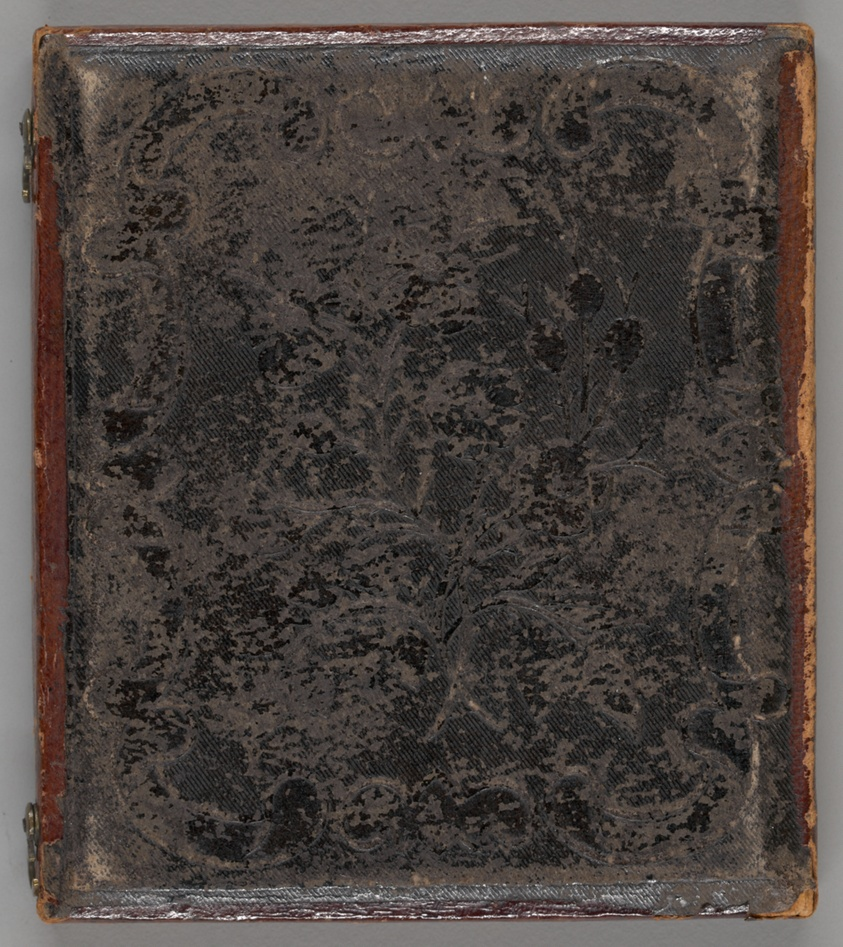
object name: Photograph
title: Untitled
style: 19th century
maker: Artist unknown; 19th century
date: 1839/99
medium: Daguerreotype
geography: Unknown Place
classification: daguerreotype; photographic process; photography; photograph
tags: portraits, portraits: male subject, photography, formal portraits